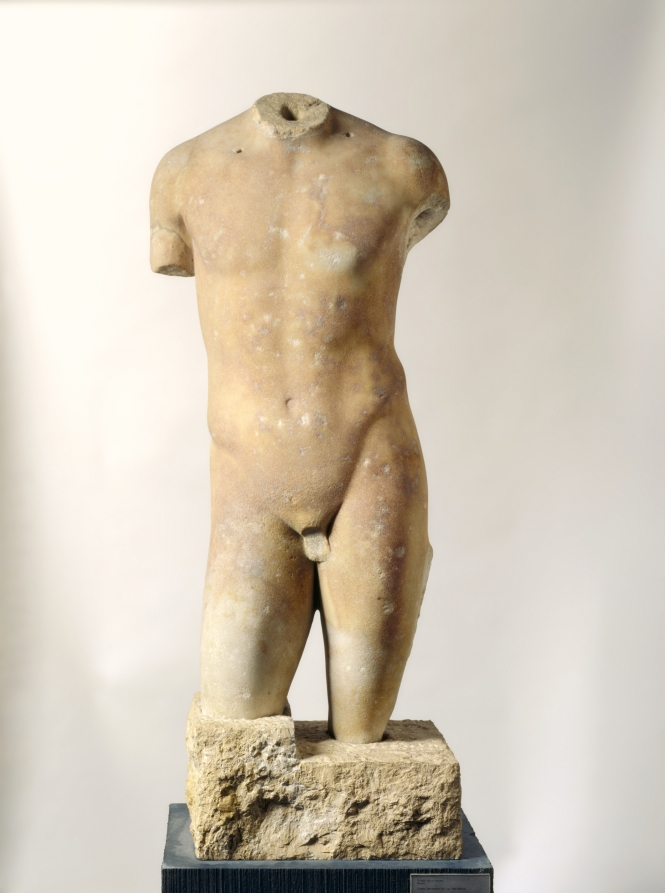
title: Torso of a Youth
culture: Greece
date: c. 150–100 BCE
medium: marble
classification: Sculpture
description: The exceptional workmanship suggests that this sculpture was carved by a Greek sculptor. Its incomplete state of preservation makes precise identification difficult, but it was most likely an Apollo or Dionysos, modeled in the soft, somewhat effeminate style of Praxiteles. The museum’s Apollo Sauroktonos is a useful parallel. The two drill holes in the upper chest are ancient and were possibly used to support separate long tresses of hair. The sculpture may well be a copy of a fourth-century original.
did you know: It was common practice in the 1700s and 1800s to attach new heads or limbs to fragmented ancient statues like this one.